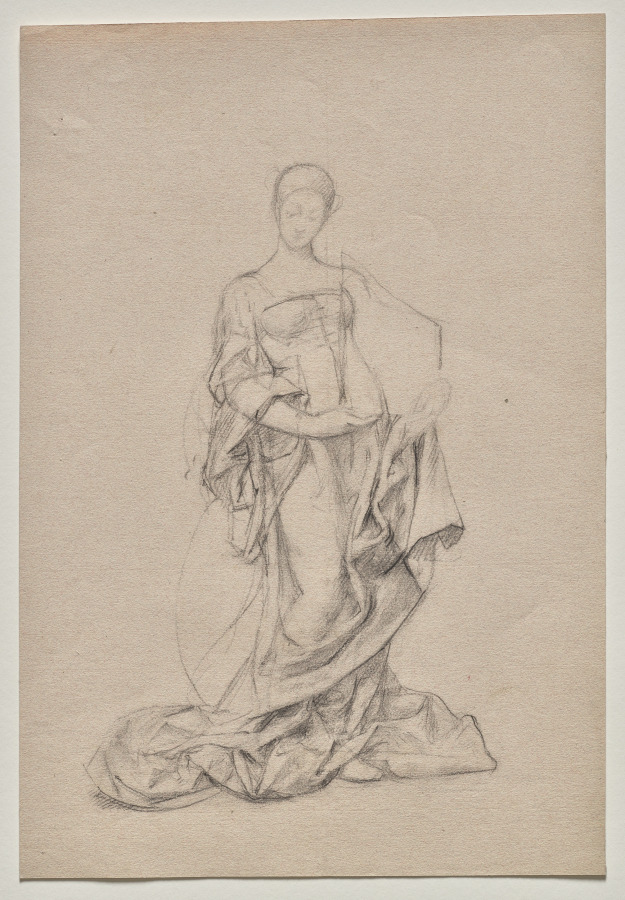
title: Architecture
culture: France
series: Muses of the Arts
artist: Marie Bracquemond (French, 1840–1916)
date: 1878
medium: black chalk on pale pink wove paper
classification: Drawing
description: Marie Bracquemond was among a few women artists within the Impressionist circle. After exhibiting at the Salon from a relatively young age, she married the printmaker Félix Bracquemond and met artists such as Claude Monet and Edgar Degas through his friendship with them. This drawing is one of several compositions related to Muses of the Arts, one of Bracquemond’s best known works, featuring personifications of various artforms—such as, here, architecture. The completed work was featured in the Exposition Universelle in 1878, while the related drawings, possibly including this one, were singled out for praise in the 1879 Impressionist group exhibition.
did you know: Although Marie Bracquemond was supported and widely respected by her colleagues in her own time, her husband’s reticence to her pursuing a career ultimately led her to limit her artistic production.